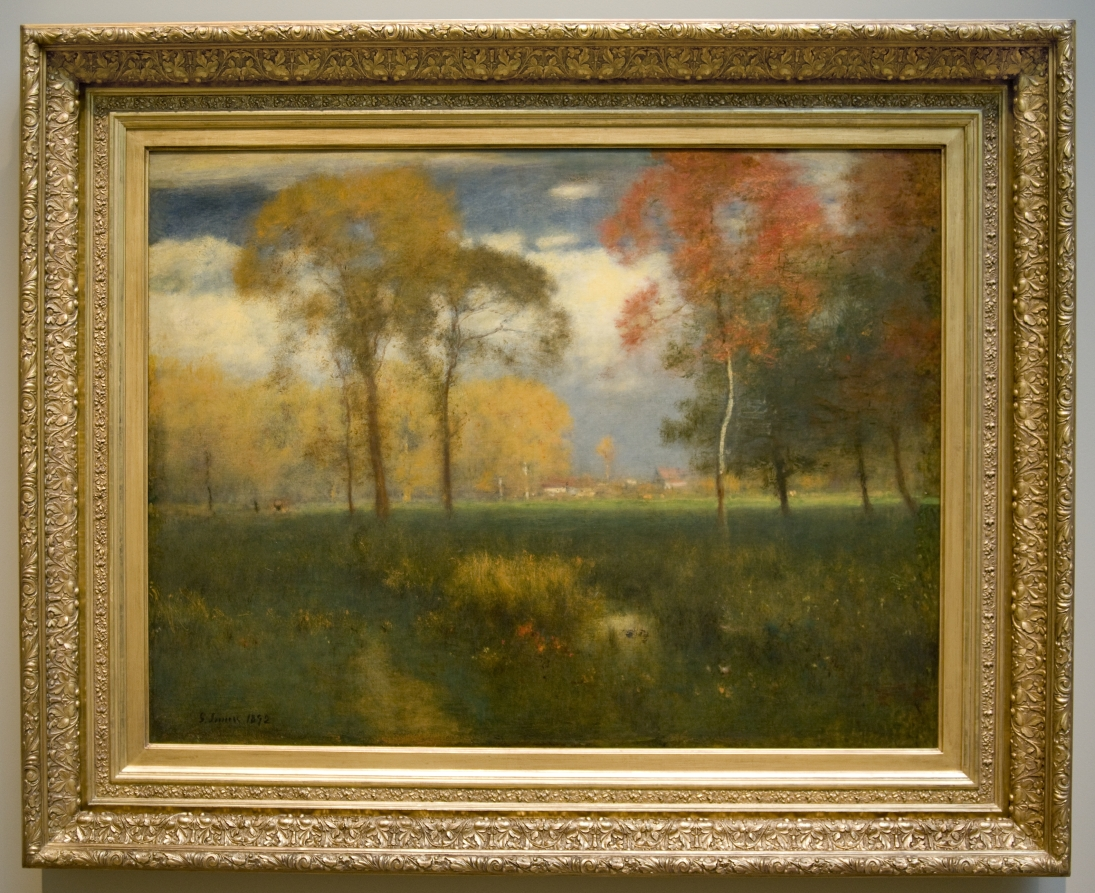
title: Sunny Autumn Day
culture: America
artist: George Inness (American, 1825–1894)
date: 1892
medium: oil on canvas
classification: Painting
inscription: Signed lower left: "G. Inness 1892:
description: Highly prolific, Inness created more than 1,000 works during a career lasting 50 years. Dated just two years before his death, Sunny Autumn Day epitomizes his late style in which the physical landscape is transformed into something akin to a spiritual apparition. Featuring blurred forms and atmospheric effects from translucent colors, this scene reflects Inness’s mystical view of the natural world.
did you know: Inness died while viewing a sunset, proclaiming, "Oh, how beautiful!” and falling to the ground.